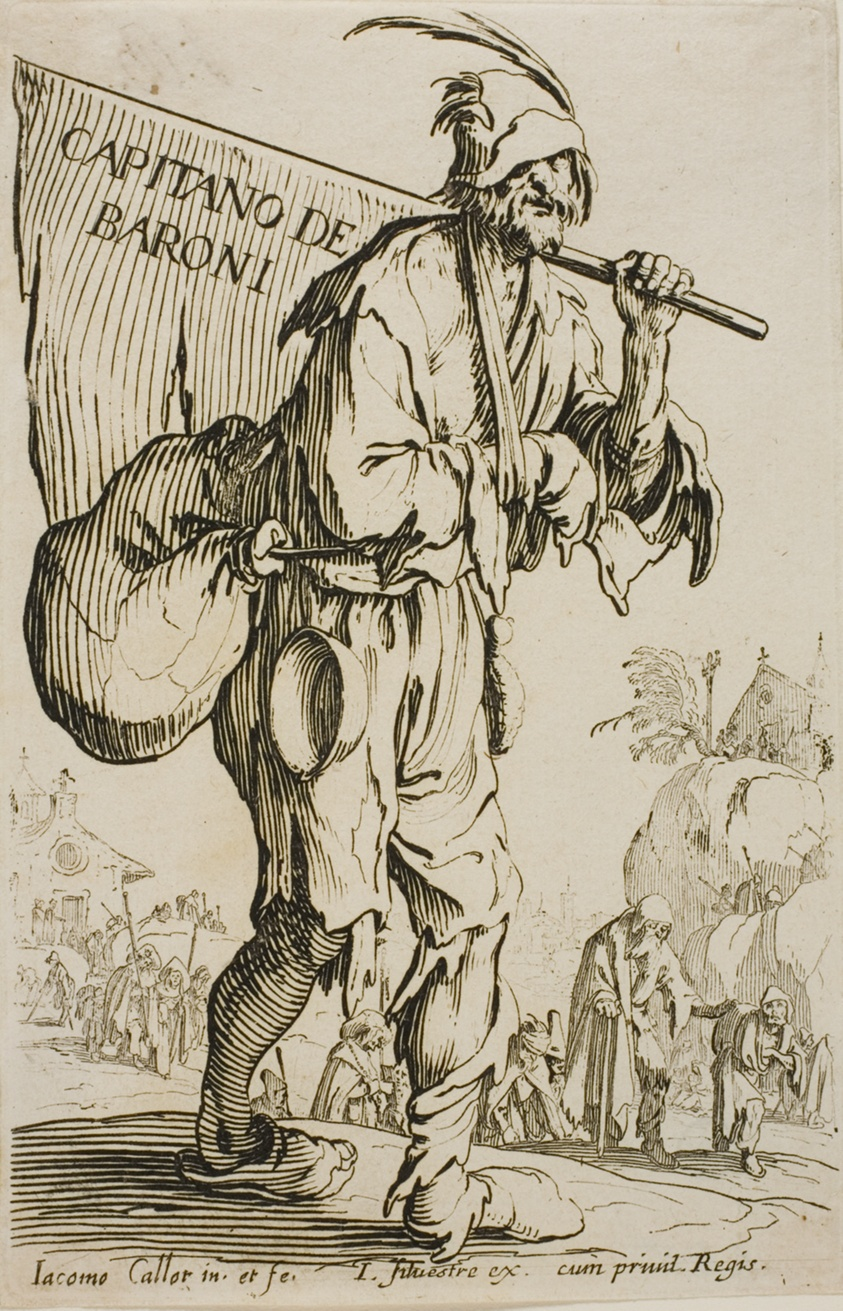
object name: Print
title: Captain of the Barons, frontispiece to The Beggars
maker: Jacques Callot (French, 1592-1635)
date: c. 1622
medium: Etching on ivory laid paper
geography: France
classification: etching; print; prints and drawing